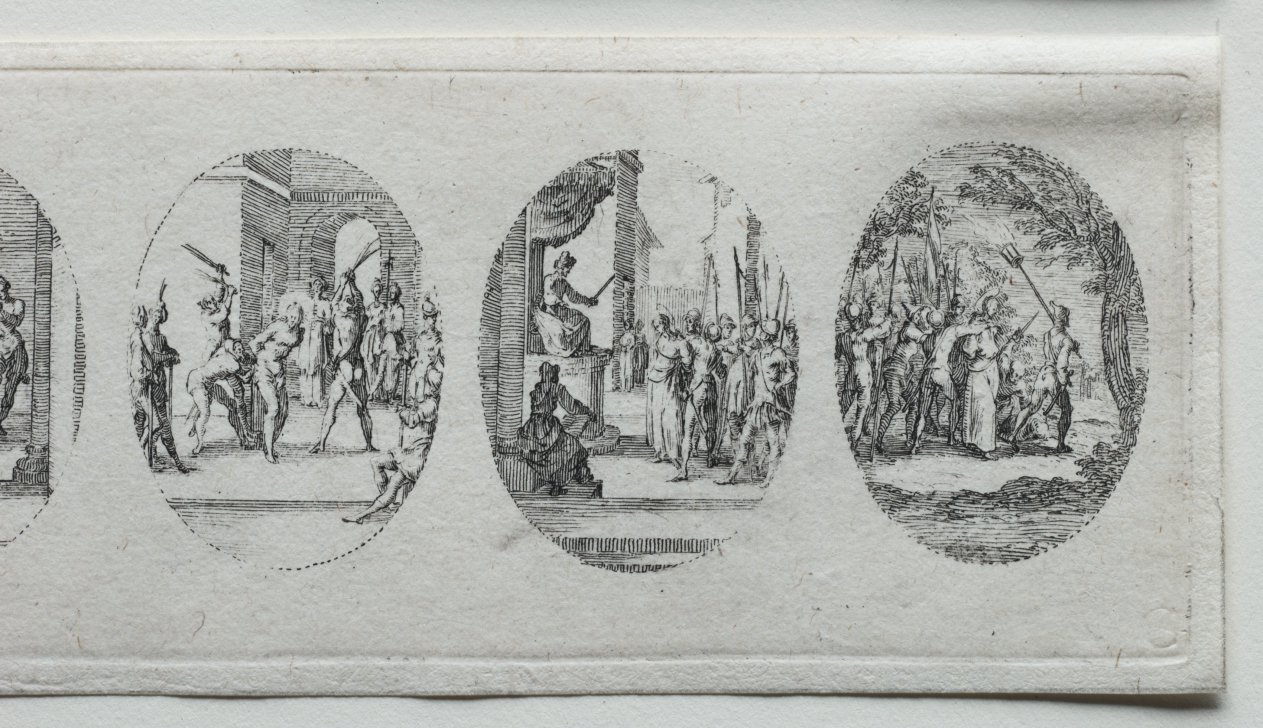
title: The Mysteries of the Passion: Christ Taken Captive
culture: France, 17th century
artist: Jacques Callot (French, 1592–1635)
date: 1631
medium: etching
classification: Print